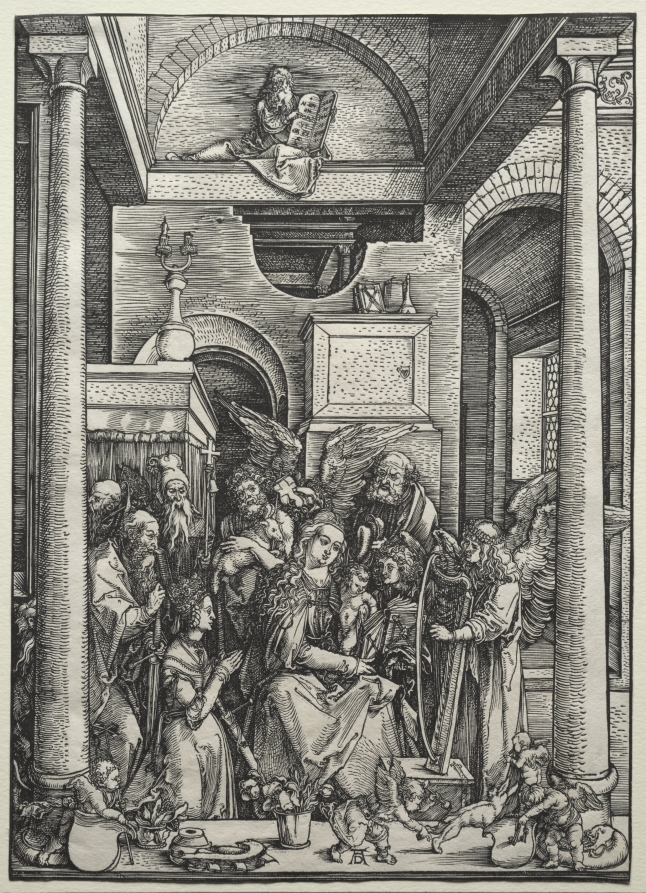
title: The Virgin and Child Surrounded by Saints and Angels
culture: Germany, early 16th Century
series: The Life of the Virgin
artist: Albrecht Dürer (German, 1471–1528)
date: c. 1500–1502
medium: woodcut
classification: Print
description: Dürer depicted the scene of the Virgin’s death (1959.99.18) as an intimate one, with the apostles keeping vigil around her deathbed. Three days later they witnessed Mary’s bodily assumption into paradise where she was crowned the Queen of Heaven (1959.99.19). The final print (1959.99.20), which some believe was conceived independently from the series because it falls outside of the typical narrative, shows the Virgin in a domestic setting surrounded by several saints, angels, and putti that celebrate her life-an especially fitting way to end the series.